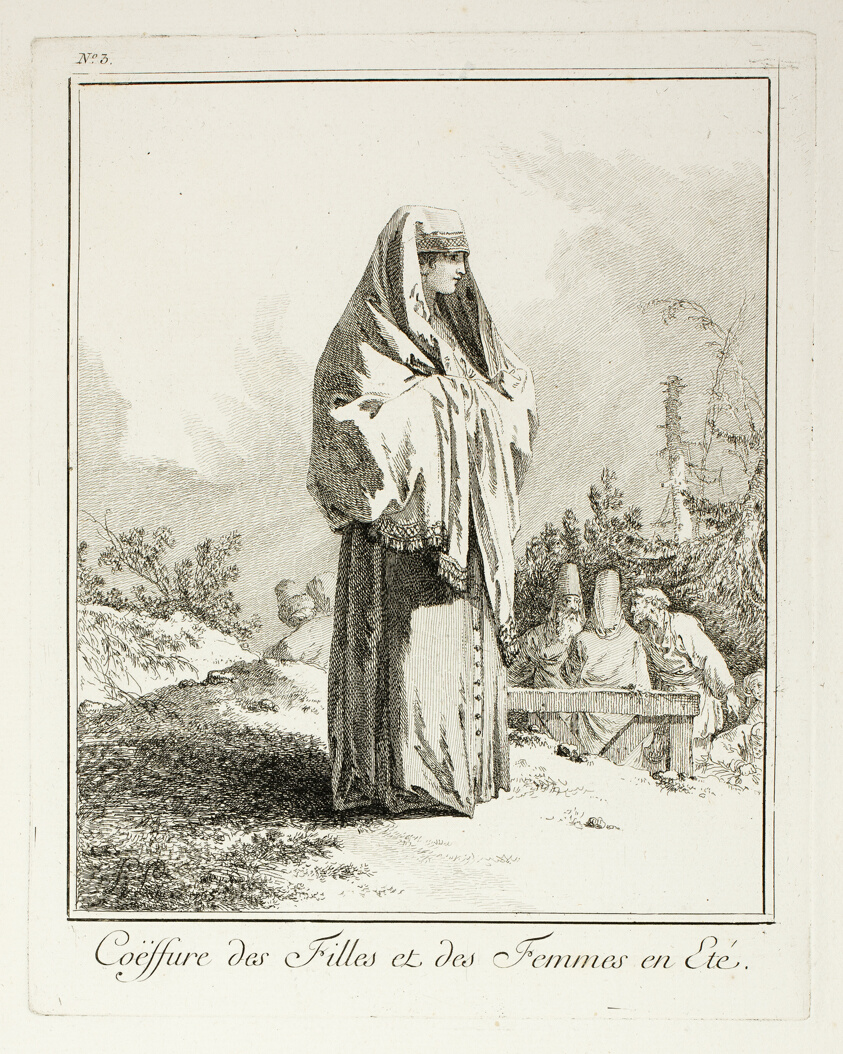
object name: Print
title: Headdress for Girls and Women in summer, plate three from Divers Habillements des Peuples du Nord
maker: Jean-Baptiste Le Prince; French, 1734-1781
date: 1765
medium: Etching on paper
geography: France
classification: etching; print; prints and drawing